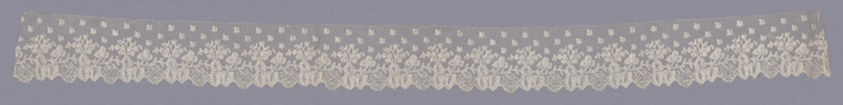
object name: Textile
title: Border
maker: Belgium, Flanders, Mechlin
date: c. 1820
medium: Cotton and linen, bobbin straight lace of a type known as "Mechlin" with a Mechlin mesh ground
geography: Flanders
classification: textile; lace - bobbin; lace